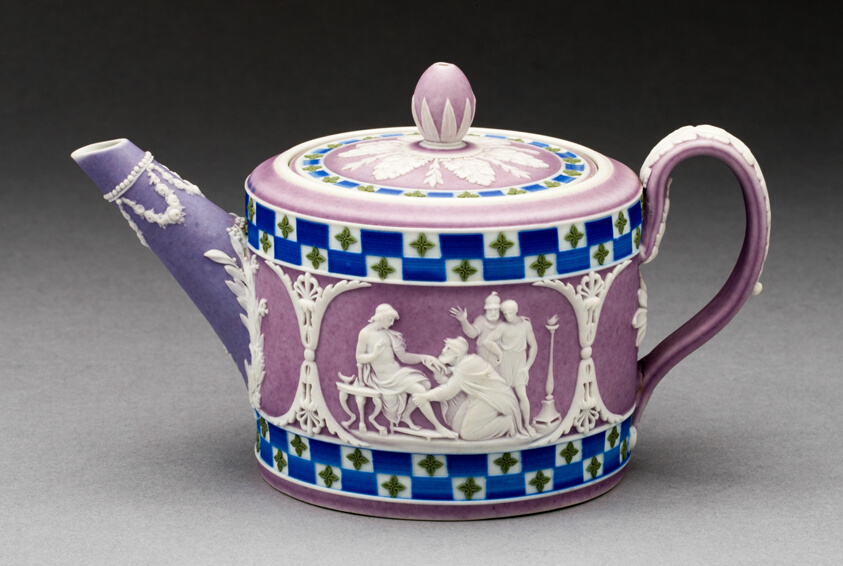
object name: Ceramics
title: Teapot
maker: Wedgwood Manufactory (England, founded 1759)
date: c. 1790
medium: Stoneware (jasperware)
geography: Burslem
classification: teapot; teaware; stoneware; european decorative arts; ceramics